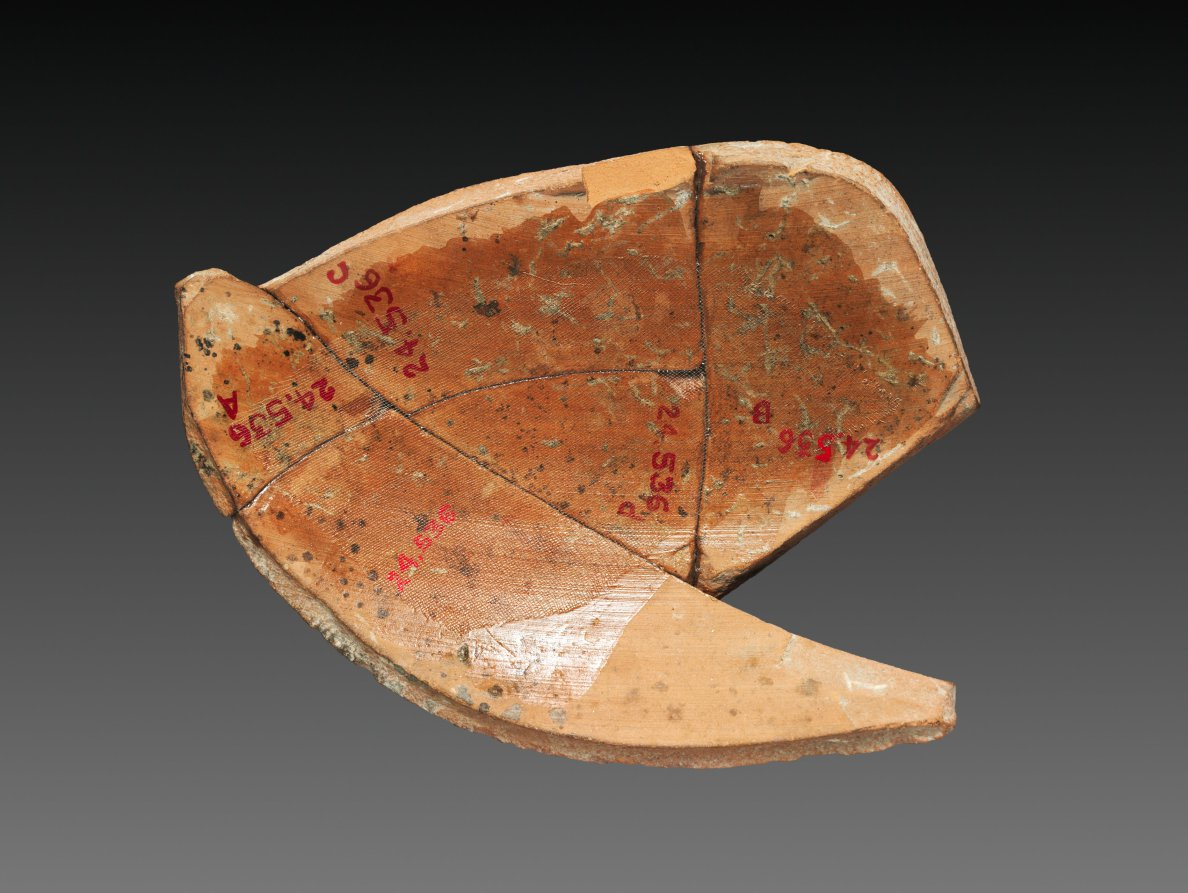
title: Fragment from Black-Figure Amphora (Storage Vessel): Musicians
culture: Greek, Attic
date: c. 530–520 BCE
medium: ceramic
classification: Ceramic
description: Two musicians appear on this amphora fragment. The first, long-haired and bearded, holds an instrument that is mostly lost, but with a curving arm that identifies it as a lyre, probably of the standard (chelys, or tortoiseshell) type. His bearded companion, with curly hair and an ornate robe, plays a concert kithara, a more elaborate seven-stringed instrument.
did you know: Vase painters depict four different kinds of lyres, or stringed musical instruments.